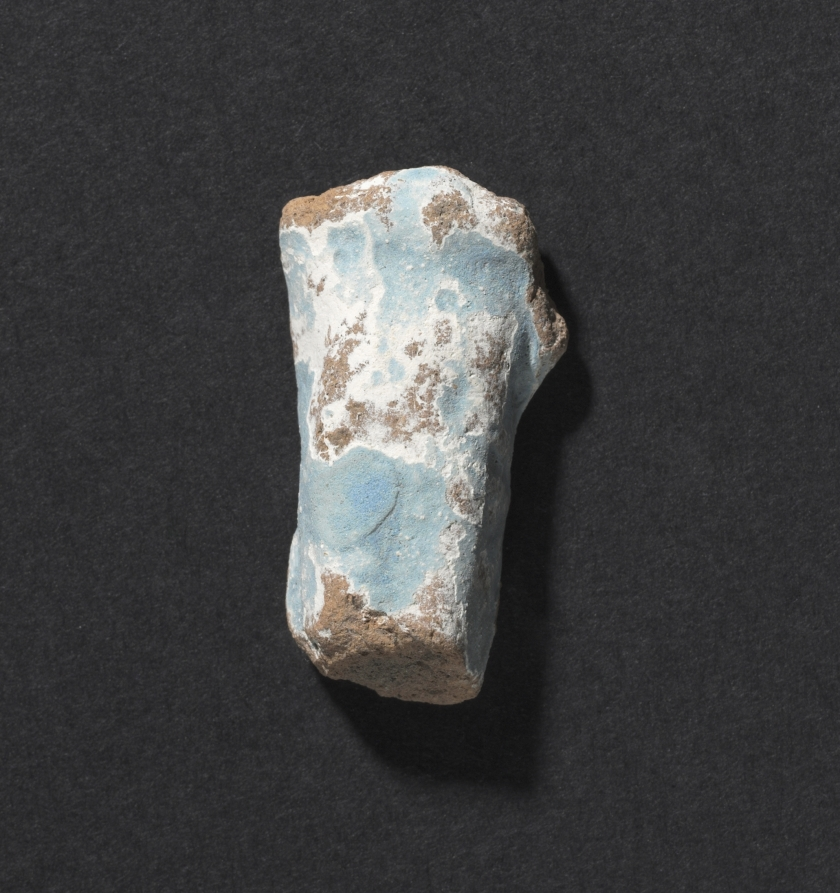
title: Shawabty of Ditamenpaankh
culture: Egypt, Late period (715–332 BCE), Dynasty 25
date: 715–656 BCE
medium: terracotta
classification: Funerary Equipment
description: High demand for shawabtys in the Late Period, a time when as many as 400 or more shawabtys were placed in the tomb with the deceased, gave rise to a specialized container for storing them: the shawabty box. This example is inscribed for the lady of the house, Ditamenpaankh, and was probably one of a pair originally made for her. The single-masted boat on the box's lid is perhaps an allusion to the pilgrimage of the deceased to the holy city of Abydos, the cult city of Osiris, king of the dead. The shawabtys inside are crude, mass-produced examples cast in an open mold. Made of terracotta, their blue paint imitates more costly shawabtys made of faience. As for the shawabty spell, it has been removed from its traditional location on the shawabty's front and relocated onto the sides of box, where it needed only to be written once, thus expediting production.